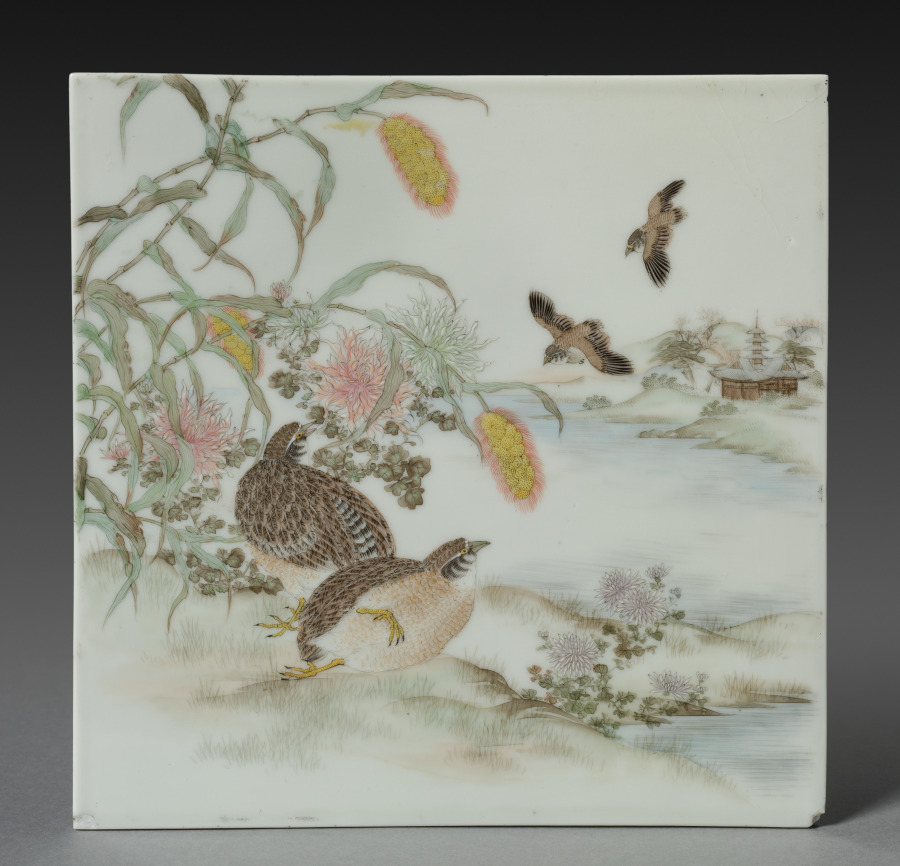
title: Plaque with Quail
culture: Japan, Meiji period (1868–1912) or Taishō period (1912–26)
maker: Katō Zenji 3 (Japanese, 1848–1918)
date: late 1800s–early 1900s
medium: overglaze enamel porcelain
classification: Ceramic